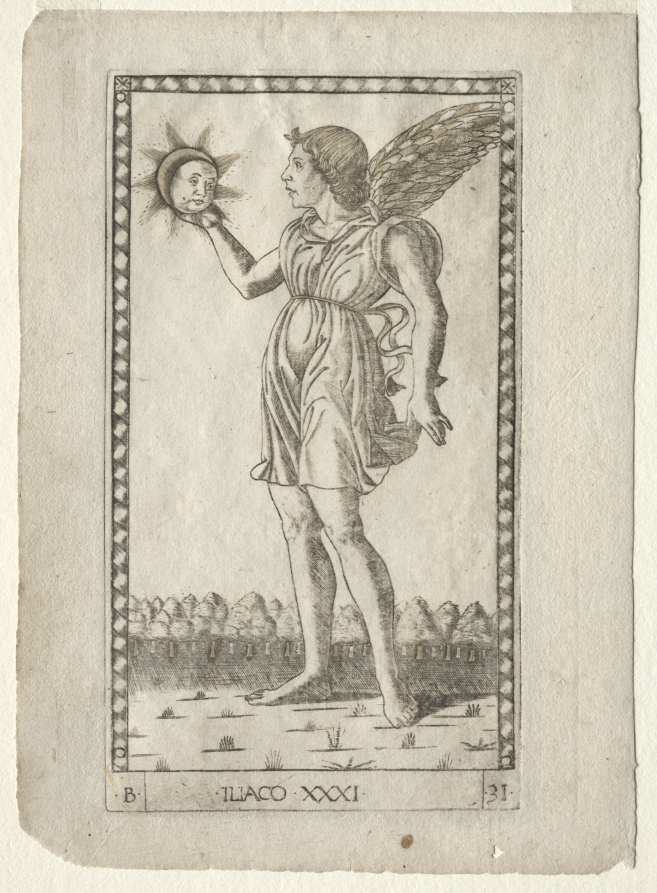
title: Genius of the Sun (from the Tarocchi, series B: Cosmic Principles & Virtues, #31)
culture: Italy, Ferrara, 15th century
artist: Master of the E-Series Tarocchi (Italian, active 1460s)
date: before 1467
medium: engraving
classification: Print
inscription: Lettered below the image of Iliaco (Genius or Spirit of the Sun): ·B· / ·ILIACO·XXXI· / ·31·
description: This engraving is part of the group marked with the letter “B”, and named Cosmic Principles and the Virtues, which comprises the three Universal principles or Genii (Light, Time, and Space) alongside the four cardinal virtues (Prudence, Temperance, Fortitude and Justice) and the three theological ones (Faith, Hope, and Charity). The three allegorical figures of the Genii open group B and appear to be an artistic invention of the author of the Tarocchi series. Here, Iliaco (Genius or Spirit of the Sun) personifies the Sun which is thought to be the soul of the world. He is shown as a winged full-length male youth in profile, turned to left. Behind him is a distant forest. In his right hand, Iliaco holds up a sun-face.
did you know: This is the second personification of the sun that appears within the set of Tarocchi, after the engraving displaying Apollo (1924.432.20) and before the one showing the sun as a star (1924.432.44).